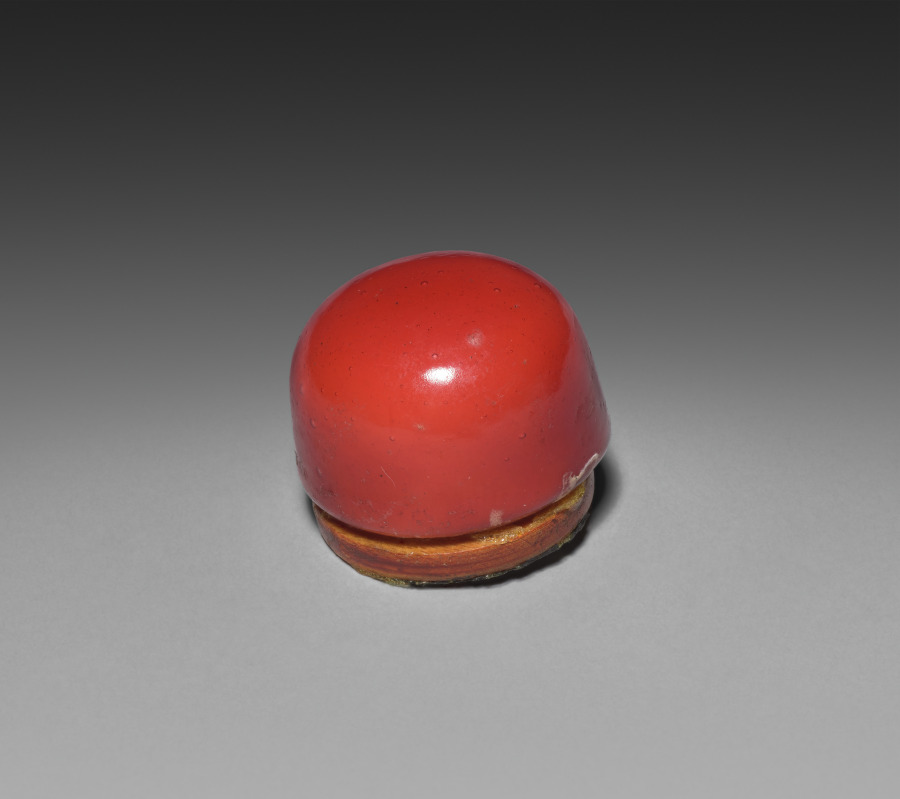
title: Snuff Bottle with Stopper (stopper)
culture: China, Qing dynasty (1644–1911), Qianlong reign (1736–95)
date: 1736–95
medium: crystal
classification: Stone